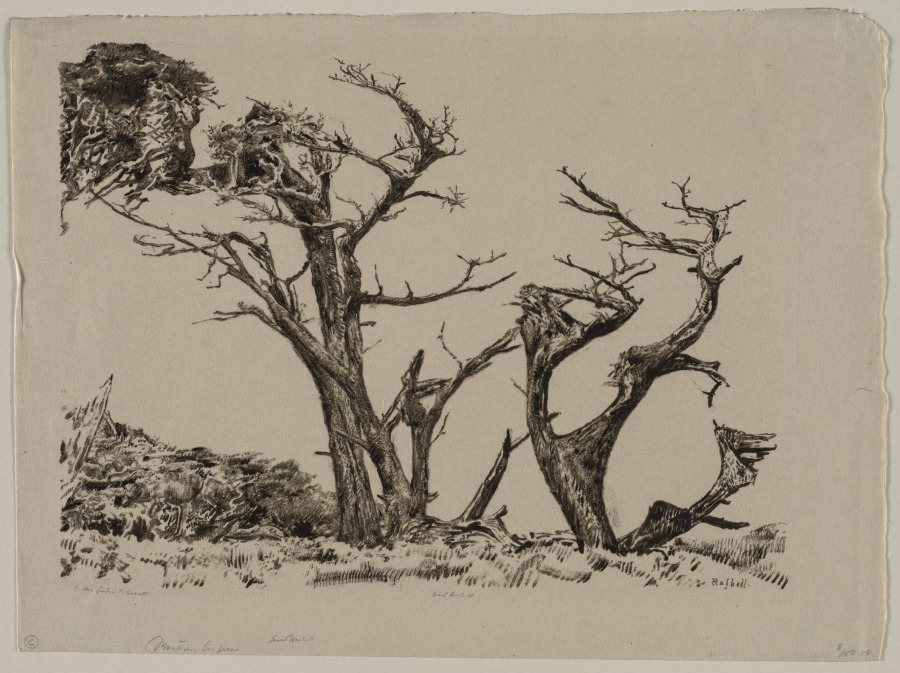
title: Monterey Cypress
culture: America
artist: Ernest Haskell (American, 1876–1925)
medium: monotype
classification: Print